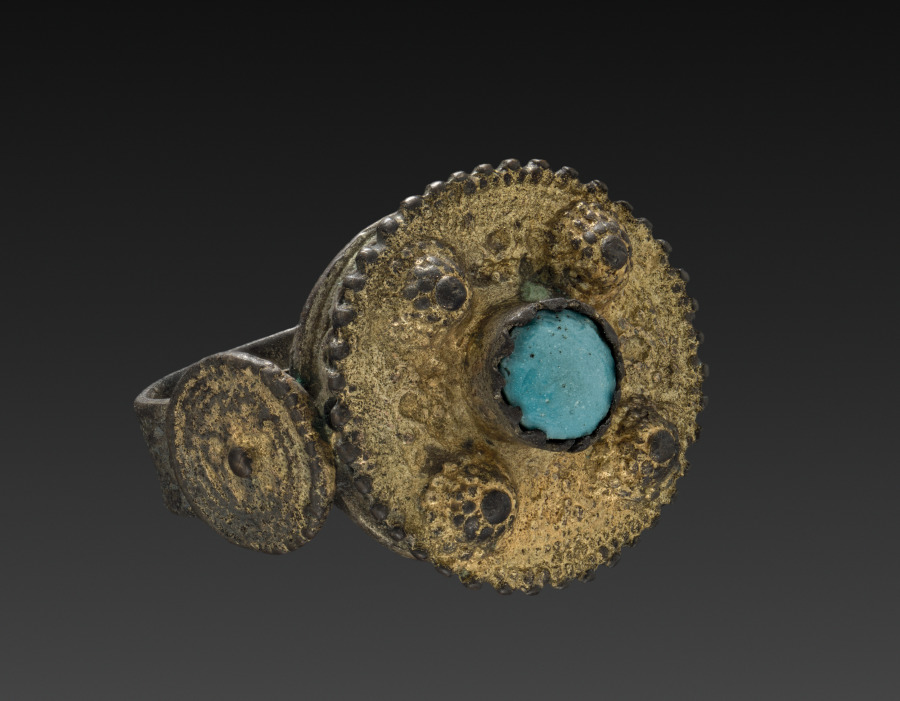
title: Ring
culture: Yugoslavia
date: 1800s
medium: silver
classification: Jewelry